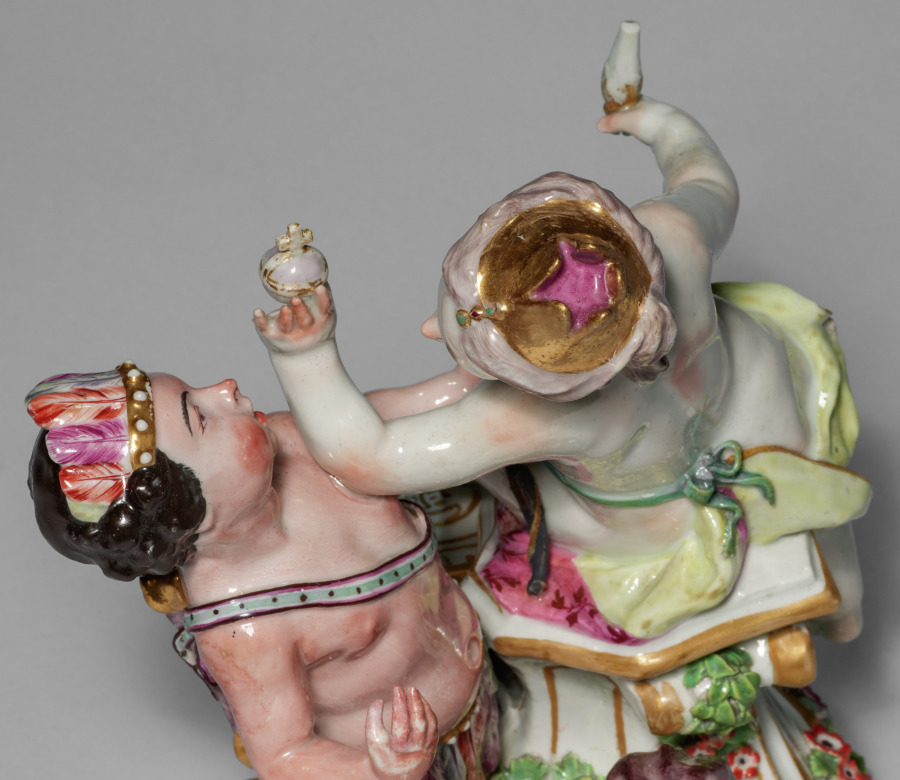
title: Figure of Europe and America from the Four Continents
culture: England, Chelsea, mid-18th century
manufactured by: Chelsea Porcelain Factory (Britain, London, 1745–84)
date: c. 1760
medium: soft-paste porcelain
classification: Ceramic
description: Often collected by wealthy British merchants who were beneficiaries of colonial expansion, figural groups were frequently part of elaborate table decorations meant to signify wealth and global dominance. Here, Europe is seen holding an orb and wearing a crown as queen of the world, suggesting Europe’s supremacy over the other continents. She is entangled with America, who is wearing feathers with a bow and arrow at her feet. This depiction of America reveals a purely imagined understanding of faraway places.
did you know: Figural representations of the four continents date back to the 1500s, but such imagery became even more popular in the 1700s as European empires expanded.